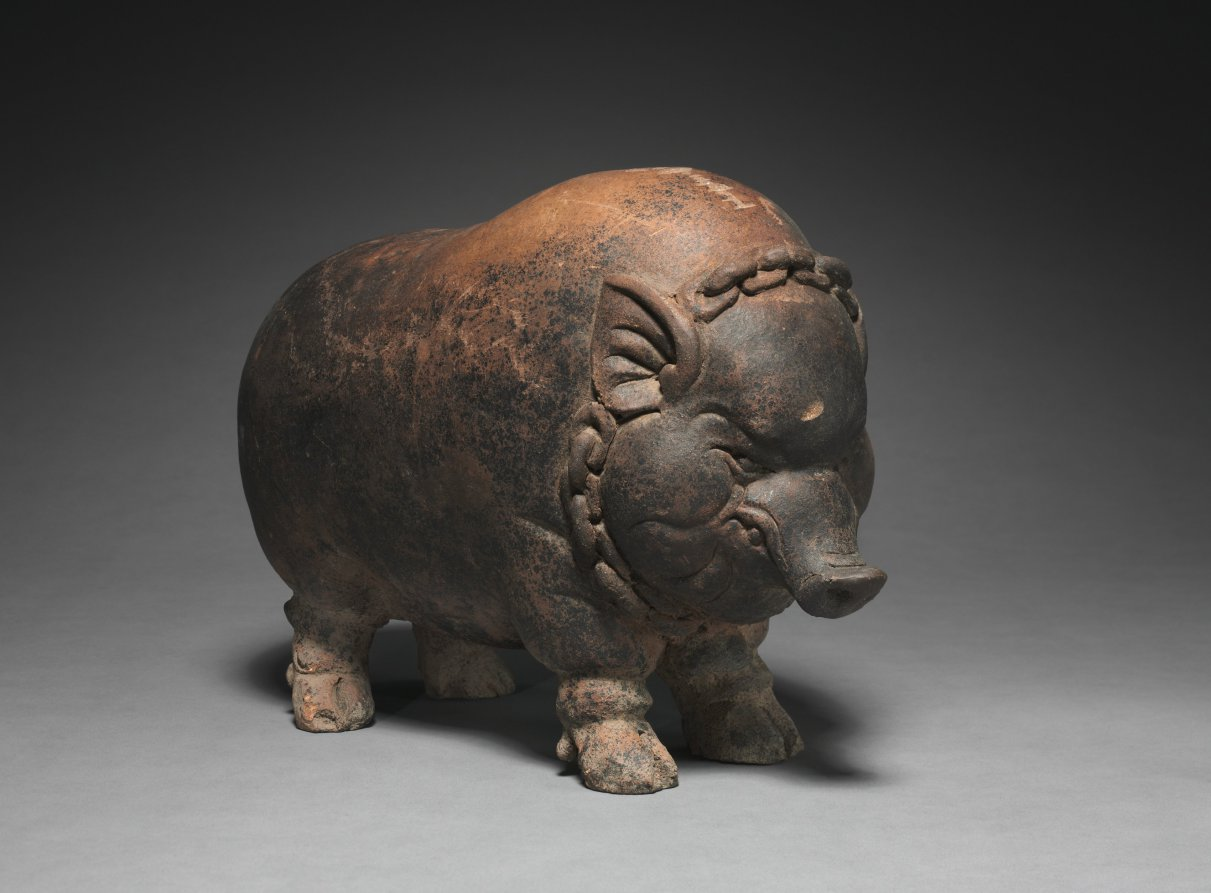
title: Piggy Bank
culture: Java, Majapahit Dynasty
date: 1300s–1400s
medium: terracotta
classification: Sculpture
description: Do I look familiar to you? My round and exaggerated form makes me perfect for storing precious coins, which could be inserted through the slot (now closed) on the hump of my back. My fierce expression is a warning to scare off any burglars, and the padlock and chain around my neck indicate my function as a personal bank. Yes, I am a piggy bank—a lucky one that has survived intact for over 500 years! Usually we end up broken by people who want our coins.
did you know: The word for piggy bank in Eastern Java is tjèlèngan, meaning ‘wild boar.’